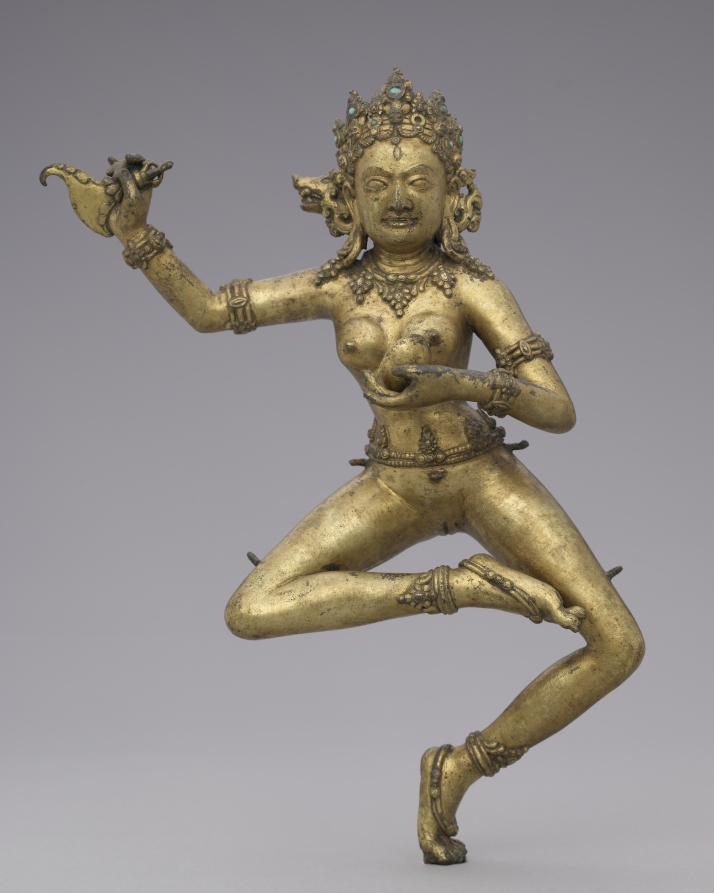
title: Vajravarahi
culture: Tibet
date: 1300s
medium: gilt bronze with turquoise inlay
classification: Sculpture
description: Vajravarahi is the tantric Buddhist counterpart to the Hindu mother goddess Varahi, identifiable by the boar head emerging above her right ear. She is a female enlightened being who emanated from the Buddhist Goddess of Perfect Wisdom. Enlightened beings transcend gender distinctions, and they can emanate as either male or female. The lithe figure dances while carrying a skull cup in her left hand. Raised up in her right hand is a ritual flaying knife with a handle in the shape of a halfvajra, used for skinning the metaphorical beast of uncontrolled passions. The pegs cast into her lower body were for holding a bone skirt.